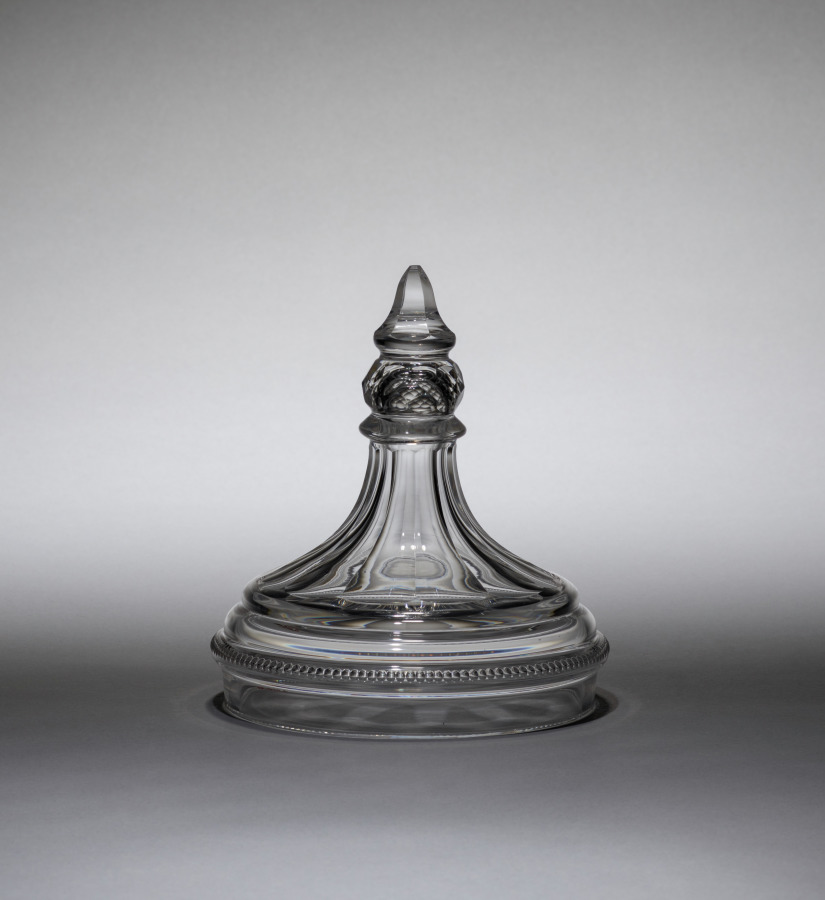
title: Candy Jar (lid)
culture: America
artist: firm of Christian Dorflinger (American, 1828–1915)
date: 1869–1880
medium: glass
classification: Glass